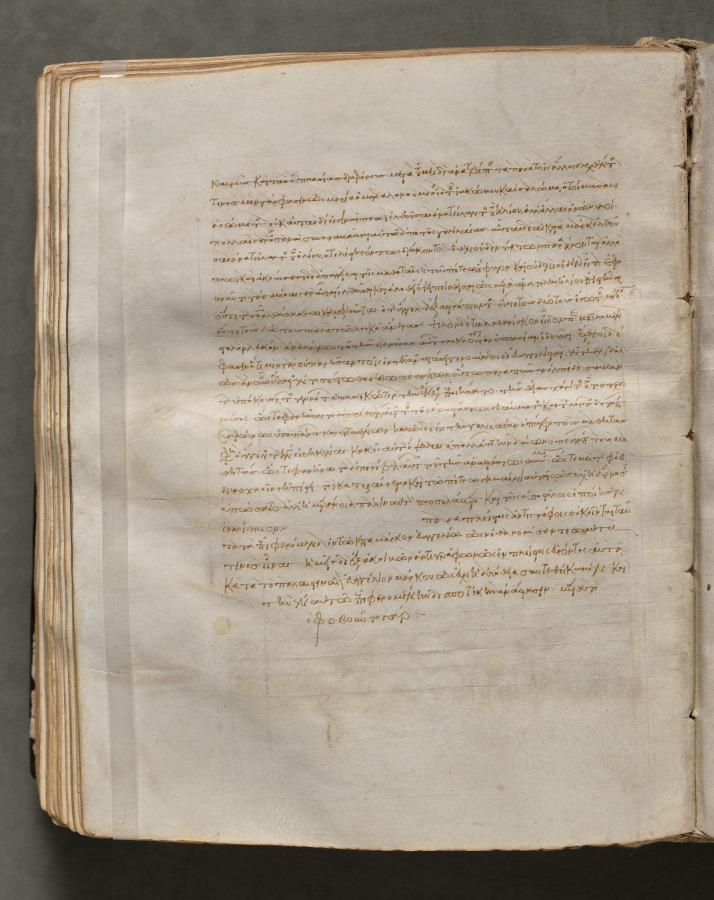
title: Text, folio 197 (verso), from a Gospel Book with Commentaries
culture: Byzantium, Constantinople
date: c. 1000–1100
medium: ink, tempera, and gold on vellum; leather binding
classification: Bound Volume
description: Each of the four gospels in this book opens on a page with brilliantly illuminated borders depicting the author of the text as well as birds-principally peacocks, symbols of the immortality of the soul-and fountains, representing the fountain of life and the salvation of the soul. This volume consists of 428 leaves with texts in Greek. Its level of sophistication suggests that it was probably written and decorated in a monastery in Constantinople.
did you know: Gospel Books were carried in procession through Byzantine churches.